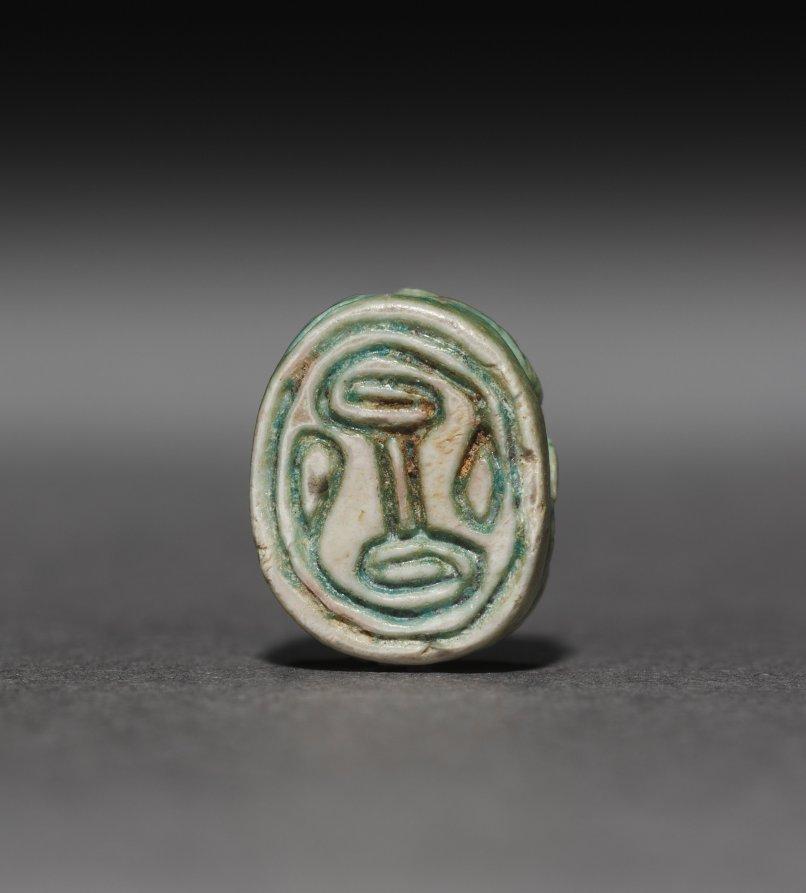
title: Scarab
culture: Egypt, Second Intermediate period (1648–1540 BCE)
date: 1648–1540 BCE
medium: steatite, traces of turquoise glaze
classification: Scarabs